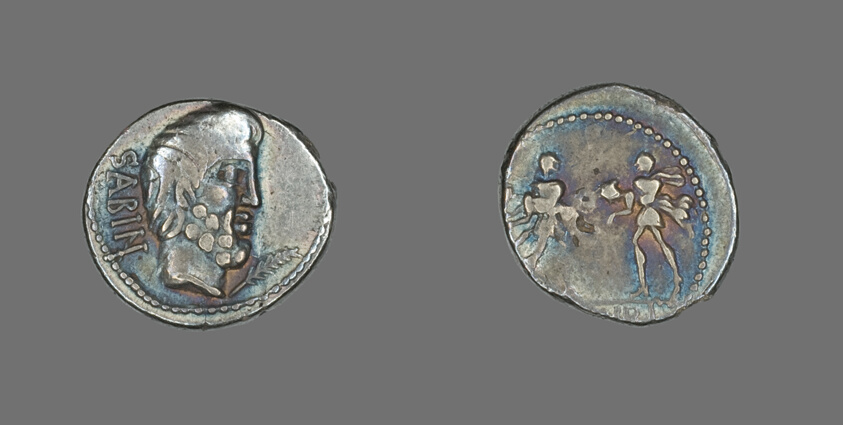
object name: Coin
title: Denarius (Coin) Portraying King Tatius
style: roman (ancient, style or period), ancient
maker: Roman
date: about 89 BCE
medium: Silver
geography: Roman Empire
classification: coin; ancient art